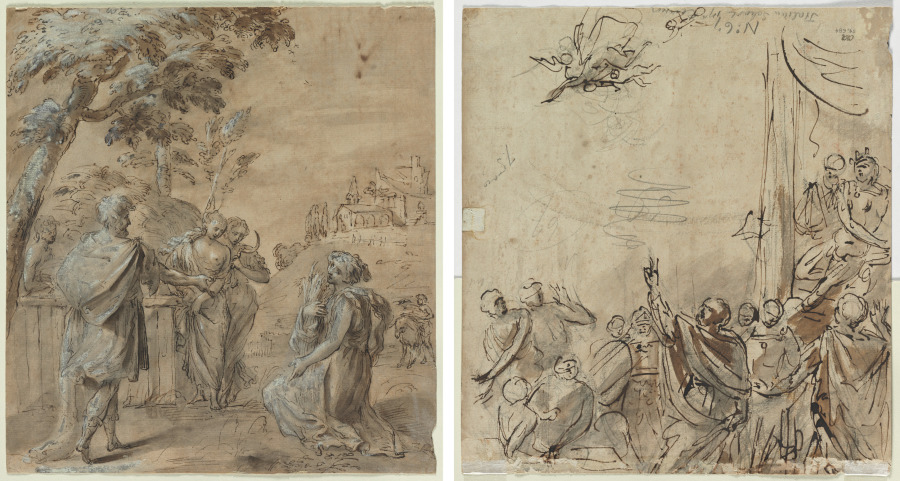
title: Ruth and Boaz (recto) The Fall of Simon Magus (verso)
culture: Italy, 17th century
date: 1600s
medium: pen and brown ink and brush and brown wash over black chalk, heightened with lead white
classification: Drawing